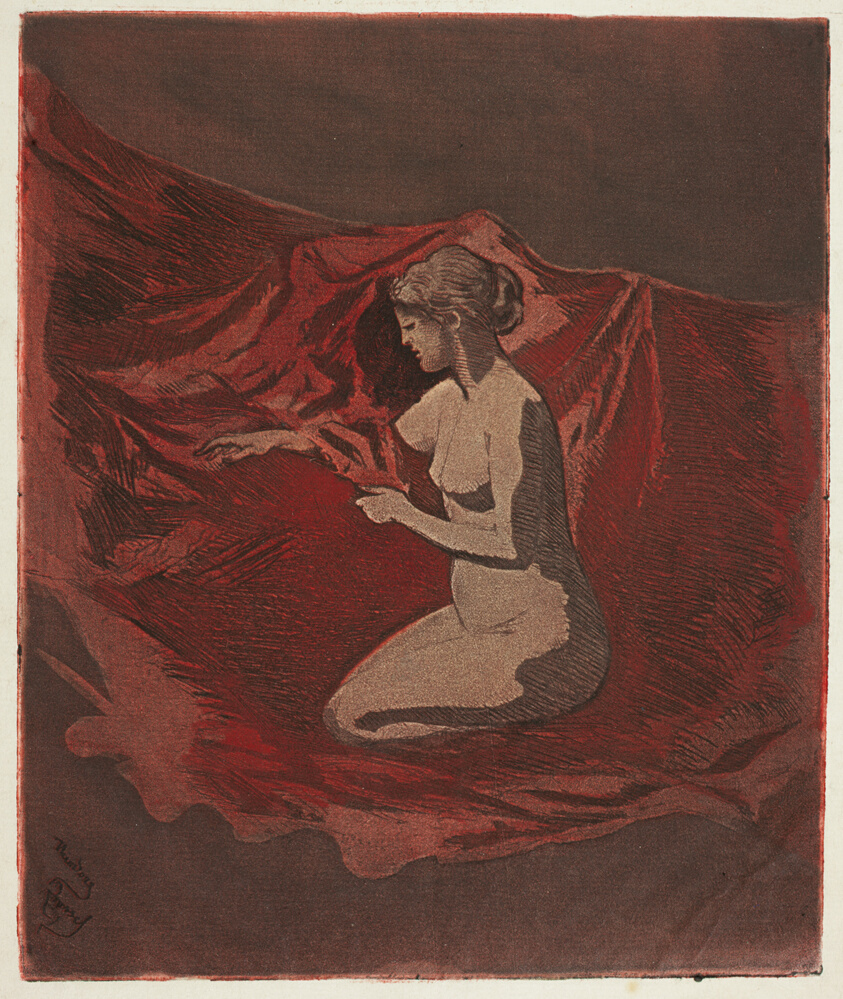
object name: Print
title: Embers Glow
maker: Theodore Roussel (French, worked in England, 1847-1926)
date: 1890–97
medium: Color etching and aquatint on cream (laid) Japanese paper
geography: England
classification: etching; aquatint; paper; print; prints and drawing